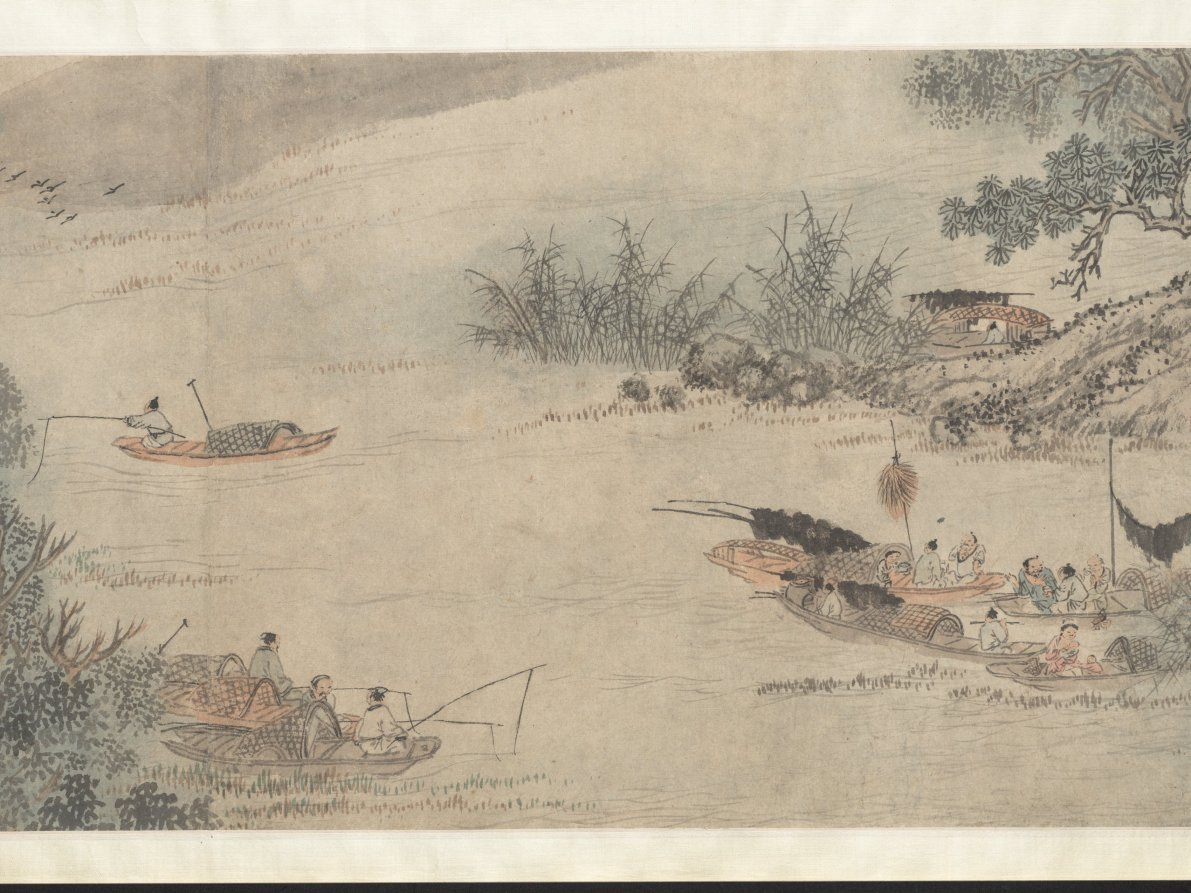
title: Fisherman's Joy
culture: China, Ming dynasty (1368–1644)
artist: Qian Gu (Chinese, 1508–c. 1578)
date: 1572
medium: Handscroll; ink and light color on paper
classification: Painting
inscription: Artist's inscription, signature, and seal: On the autumn day of the jen-shen year [1572], P'eng-ch'eng, Ch'ien Ku painted [this]. [seal] Hsüan-ch'ing shih. 2 colophons, both dated 1689, and 5 additional seals of Yün Shou-p'ing (1633-1690).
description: This painting has a scene showing two small crafts, each manned by two fishermen, practicing a traditional fishing method. In one of them, a man uses a bamboo pole to direct the movements of a cormorant bird sent into the water. Cormorant fishing, witnessed in some areas of the lower Yangzi River, appears in Zhe school paintings. Qian Gu may have borrowed these narrative figure scenes from Zhe school paintings, while his vantage point, brushwork, and soft tones align with the Wu school style. Scenes of fishermen appealed to urban and educated audiences who idealized the self-sufficient independence of fisherfolk.